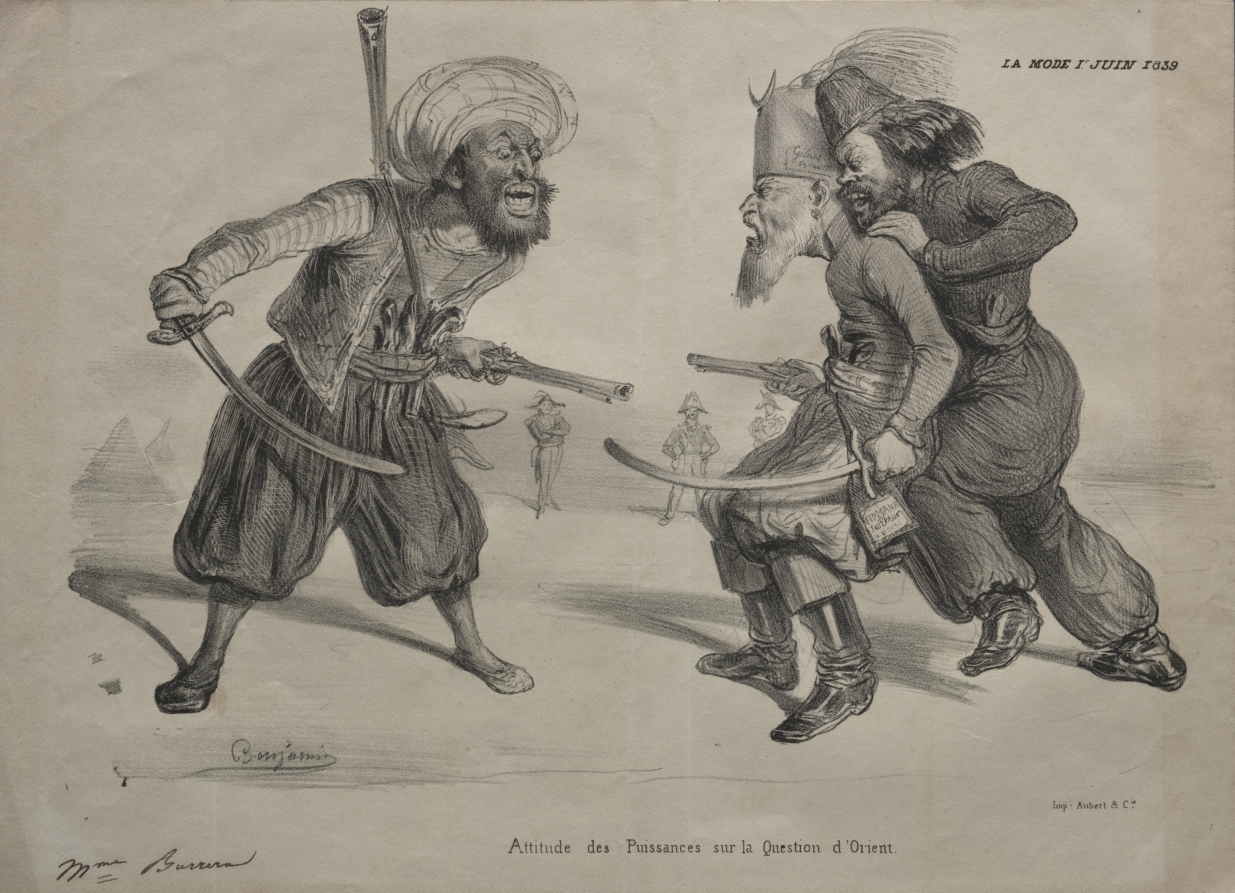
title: Positions of Power on the Question of the Orient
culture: France, 19th century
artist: Benjamin (Benjamin Roubaud) (French, 1811–1847)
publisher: Aubert & Cie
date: 1839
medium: lithograph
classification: Print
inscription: upper right: La Mode Ir Juin 1839 lower left, in stone: Benjamin lower right: Imp. Aubert & Cie lower left, in brown ink: Mme Burrern [?] Across bottom: Attitude des Puissances sur la Question d'Orient